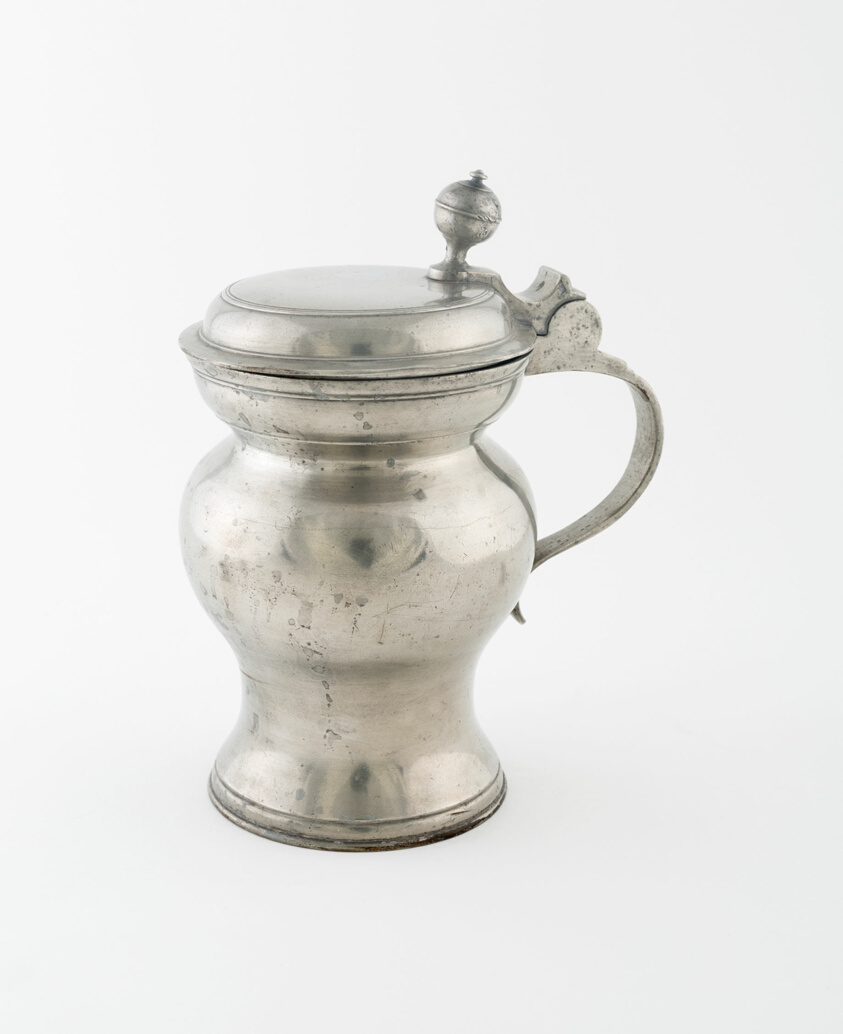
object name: Metalwork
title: Covered Tankard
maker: Johann George Kranth; German; Regensburg, Germany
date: c. 1791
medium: Pewter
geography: Regensburg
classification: drinking vessel; pewter; metalwork; european decorative arts